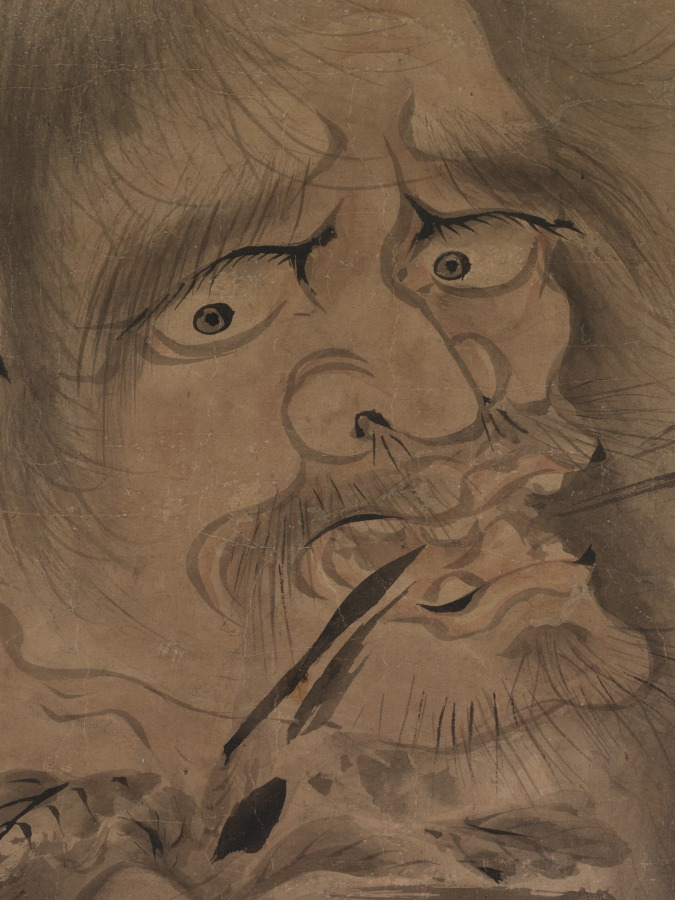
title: Shennong (Shinnō)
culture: Japan, Muromachi period (1392–1573)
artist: Shōryō (Japanese)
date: late 1400s–early 1500s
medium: hanging scroll; ink on paper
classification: Painting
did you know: Shennong legendarily taught people how to farm and also how to use plants as medicine.